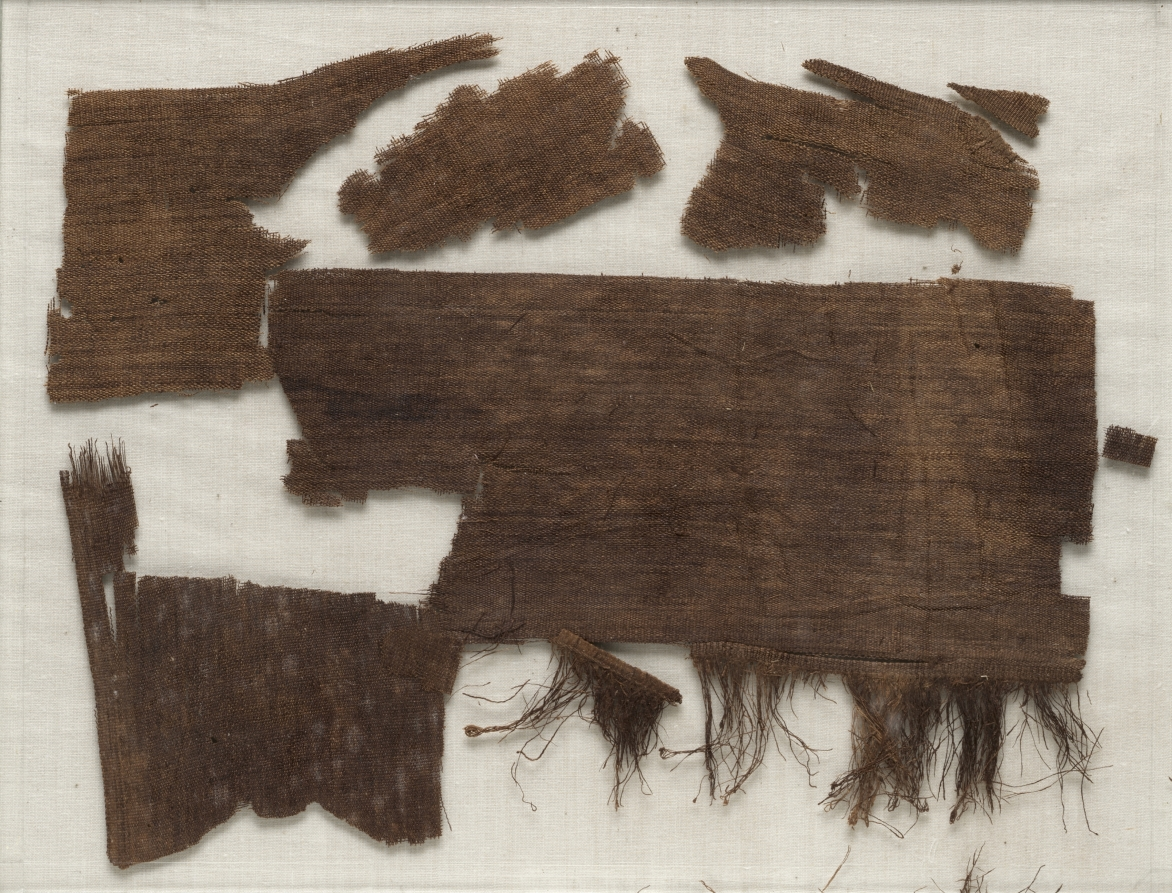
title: Fragments of Egyptian Mummy Wrappings fround in Senbi Coffin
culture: Egypt, Middle Kingdom (2040–1648 BCE)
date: c. 1918–1859 BCE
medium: linen; plain weave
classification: Textile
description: The most common type of coffin during the Middle Kingdom took the shape of a rectangular box with lid. The mummy inside was placed on his left side, facing east, his head behind the two magical eyes. These—in the shape of human eyes, to which have been added the markings of a falcon's head—were supposed to enable him to behold the rising sun, reborn daily. The long horizontal inscriptions are prayers to Anubis (god of embalming) and Osiris (god of the dead) for offerings of food and drink and other items necessary for survival in the afterlife. The short vertical inscriptions place him under the protection of the gods of earth, sky, air, and moisture, as well as various funerary deities.